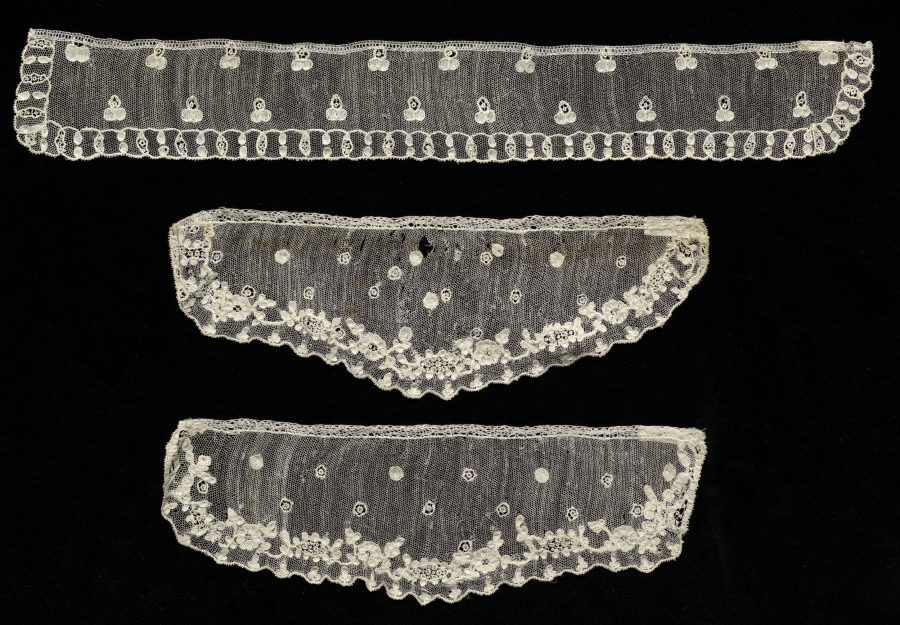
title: Lace Collar and Pair of Cuffs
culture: Italy, Burano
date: 1760–99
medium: Linen: needle lace (Burano Point)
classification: Lace